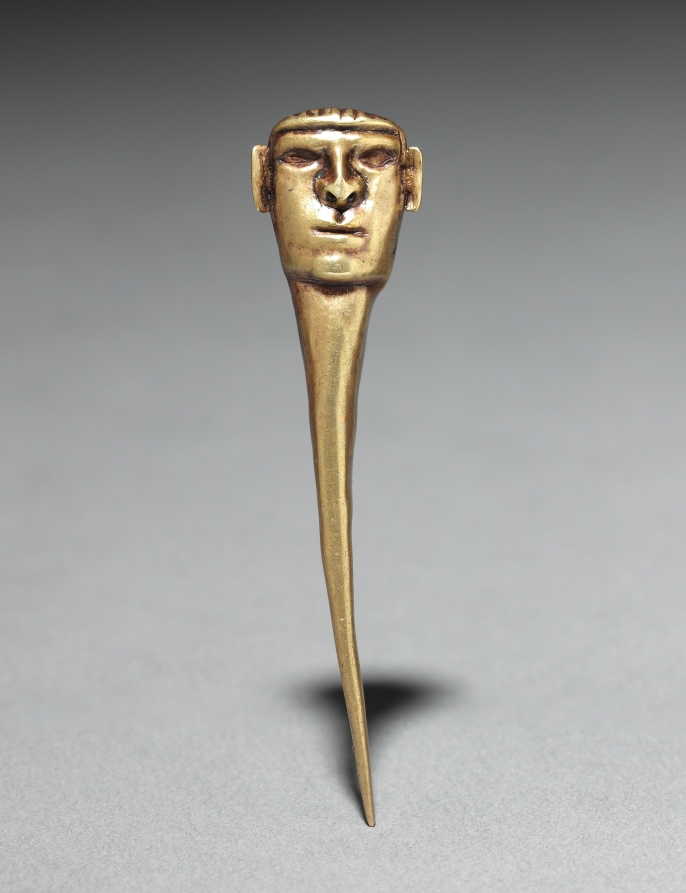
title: Pin Ornament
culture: Peru, North Highlands, Chavín de Huantar(?), Chavín style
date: c. 500–200 BCE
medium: hammered and cut gold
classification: Metalwork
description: There seems to be a link between Chavín religion and appearance of the Andes’ first large precious-metal objects, made using revolutionary new metallurgical processes. Chavín may have developed these technical innovations to express the inexpressible, the "wholly other" nature of its religion. In many areas, elite men and women wore the ornaments as emblems of their ties to this religion, and eventually were buried with them. These 16 objects, along with three others not in the museum’s collection, are said to have come as a group from Chavín itself.